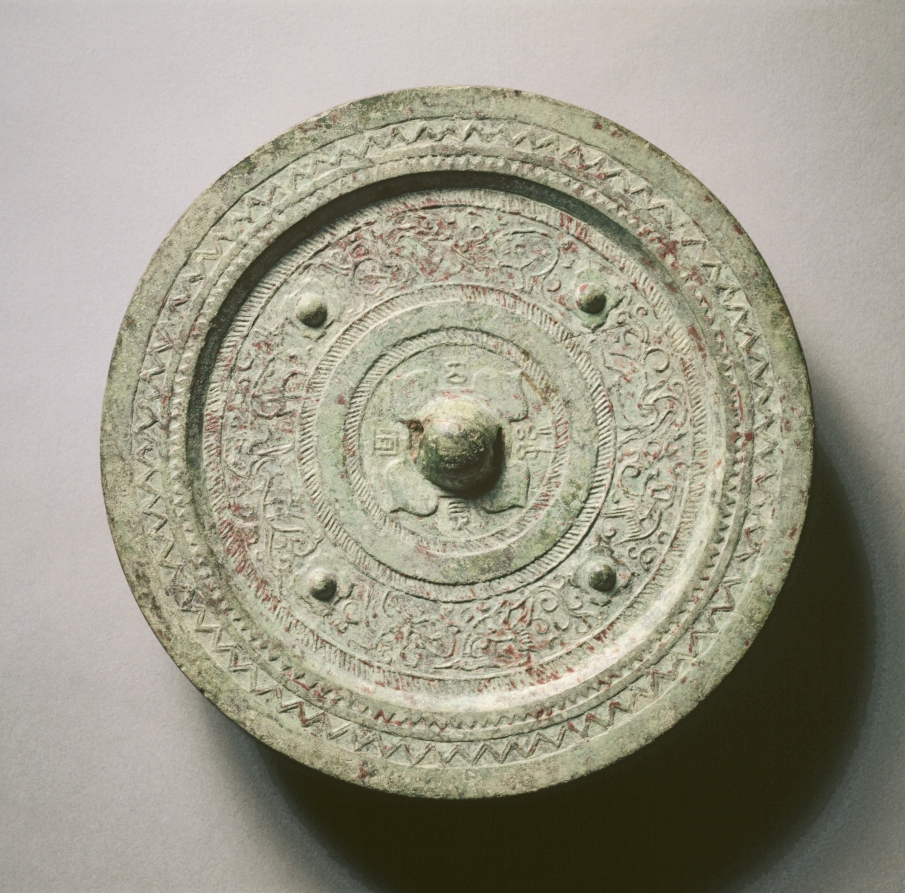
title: Mirror with Quatrefoil, Four Nipples, Animals, and Birds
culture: China, Western Han dynasty (206 BCE–8 CE)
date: late 300s BCE–50 CE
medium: bronze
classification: Metalwork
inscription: May [this mirror] be cherished by your sons and grandsons.